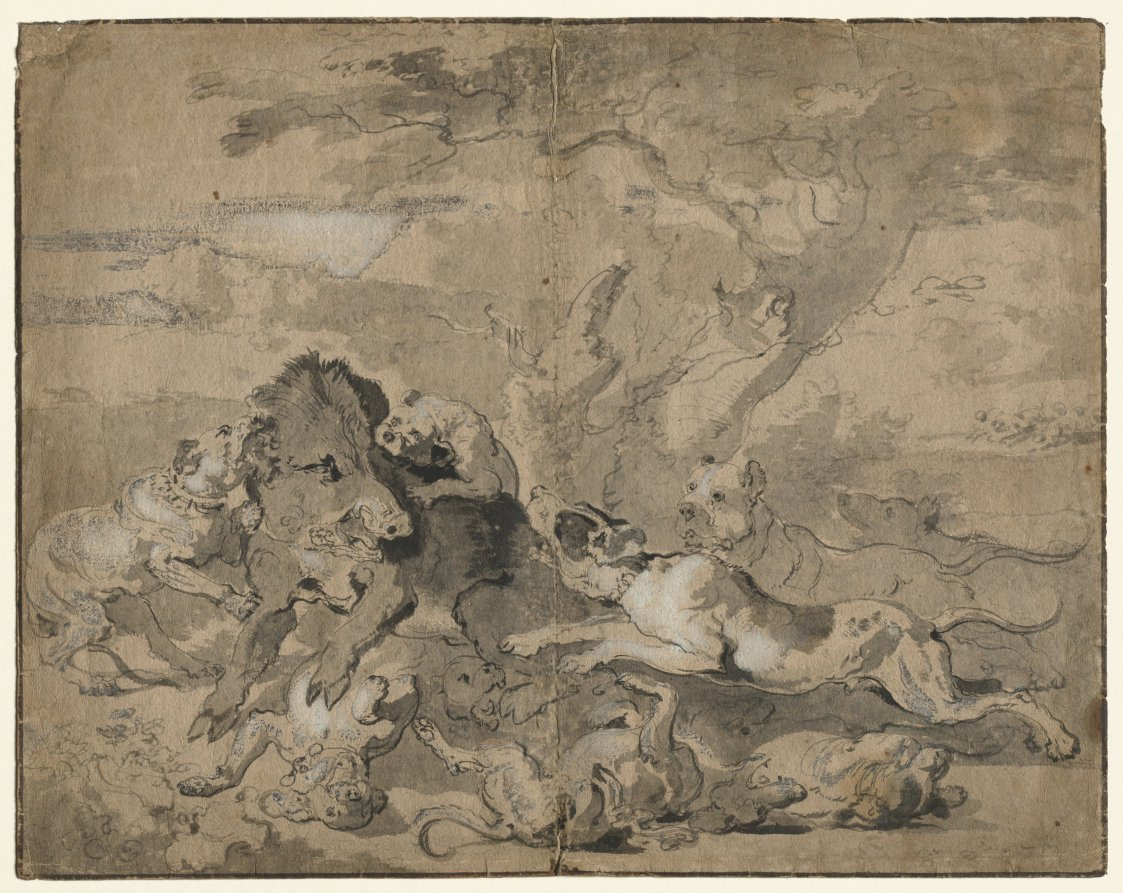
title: Boar Hunt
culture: Netherlands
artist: Abraham Hondius (Dutch, c. 1625–1695)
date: c. 1672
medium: pen and black ink and brush and black and gray wash heightened with lead white (partially oxidized); framing lines in black and brown ink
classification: Drawing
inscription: VERSO OF SECONDARY SUPPORT, lower right, in black chalk?: Frans Snyders / [illegible]